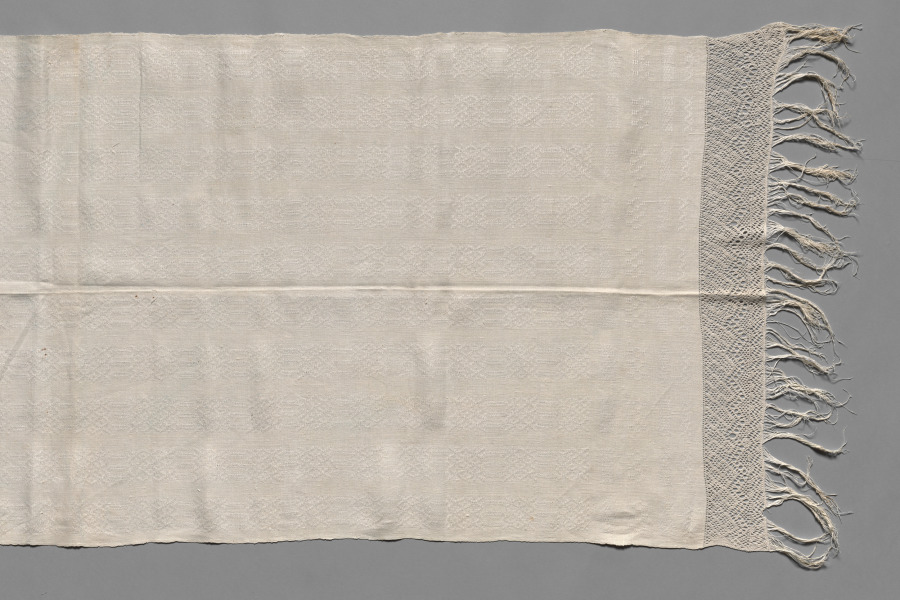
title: Towel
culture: Spain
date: 1900–1920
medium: Linen: patterned plain weave with knotted lace (macramé)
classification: Textile